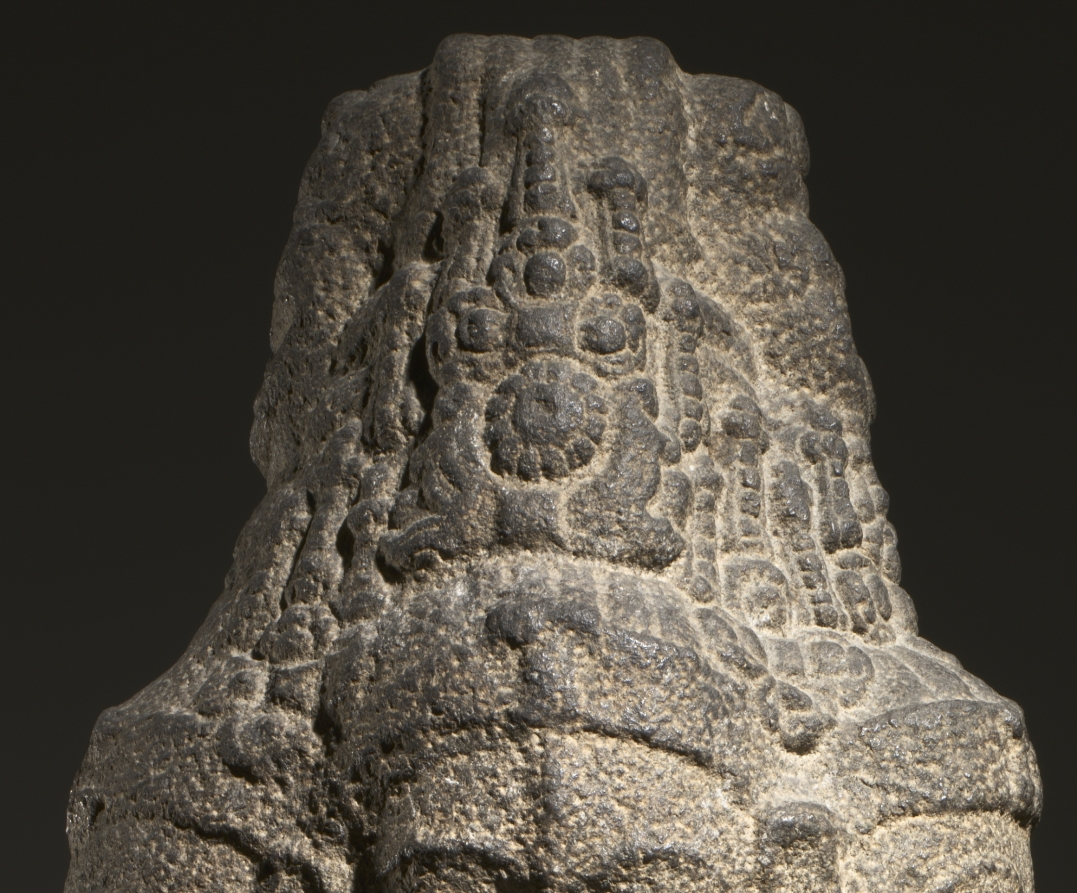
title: Brahma-Shiva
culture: South India, Tamil Nadu, Chola dynasty, late 10th - early 11th century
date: late 900s–1000s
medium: granite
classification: Sculpture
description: In the Hindu pantheon Brahma is in charge of carrying out the work of creation. In this tour-de-force of South Indian temple sculpture, he is in a special regal aspect, with the only elements of his typical priestly appearance being the prayer beads and the matted dreadlocks piled on his head. Four arms connote superhuman power, and four heads convey the idea that his creative activities spread in all four directions. His upper right hand enjoins freedom from fear, and the lower holds a lotus bud associated with birth and the process of creation. His lowered left hand is held in the gift-giving gesture, suggestive of the gift of creation he will bestow upon the world.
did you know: The back of the sculpture retains the original textured surface from a pointed chisel, suggesting it was in a niche or near a wall, protected from worshippers’ touches.